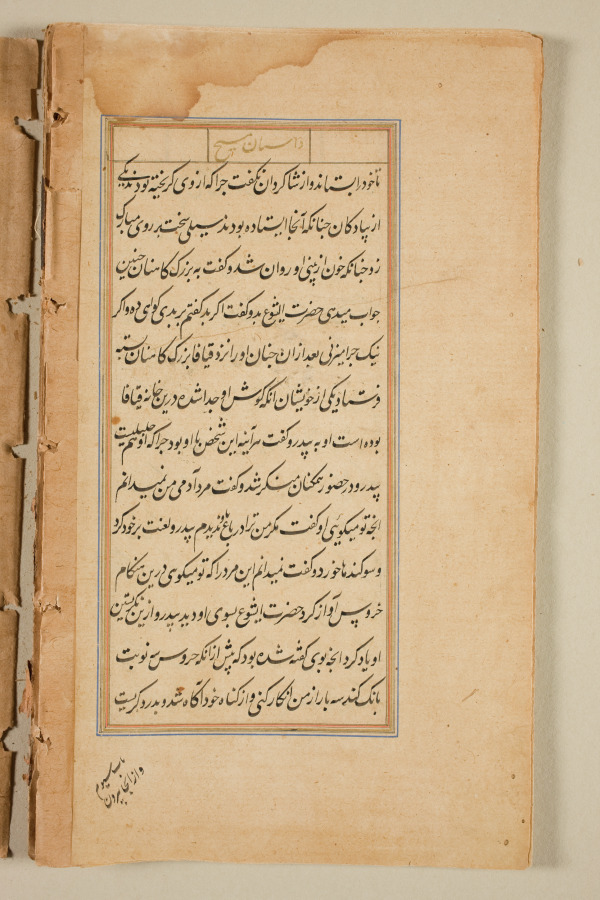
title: Text page from a Mirror of Holiness (Mir’at al-quds) of Father Jerome Xavier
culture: Mughal India, Allahabad, made for Prince Salim (1569–1627)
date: 1602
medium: Ink and gold on paper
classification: Manuscript